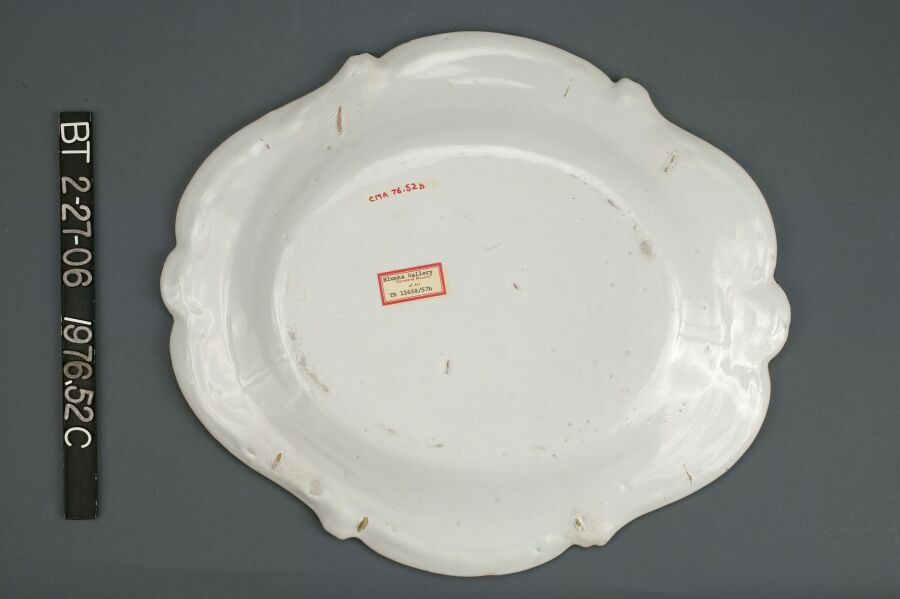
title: Covered Tureen on Stand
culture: France, Strasbourg, 18th century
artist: Strasbourg Factory (France)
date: c. 1750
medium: tin-glazed earthenware (faience) with enamel decoration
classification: Ceramic